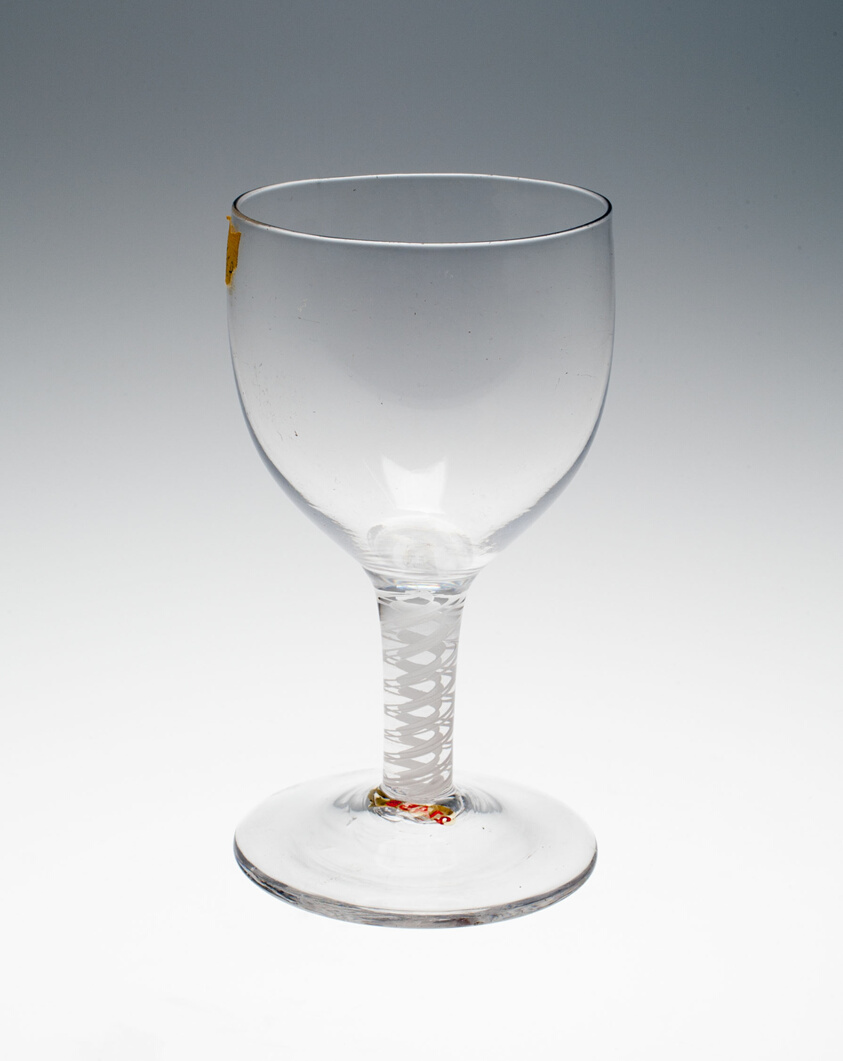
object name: Glass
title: Rummer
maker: England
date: c. 1780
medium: Glass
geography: England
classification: glass; european decorative arts